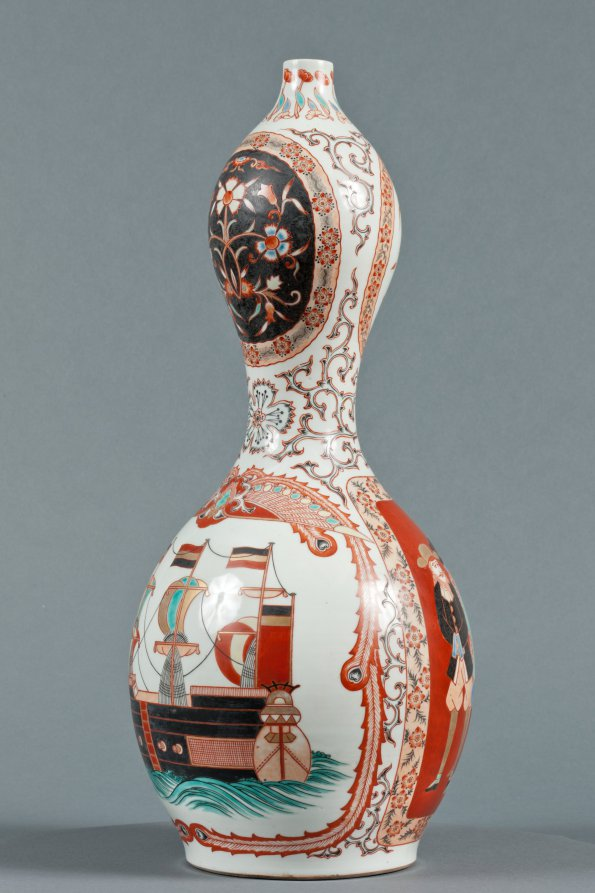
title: Bottle with Western Ships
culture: Japan, Edo period (1615–1868)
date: c. 1800–1868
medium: Porcelain with decoration in colored enamels and underglaze blue, overglaze enamels, and gold (Hizen ware, Arita type)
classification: Ceramic